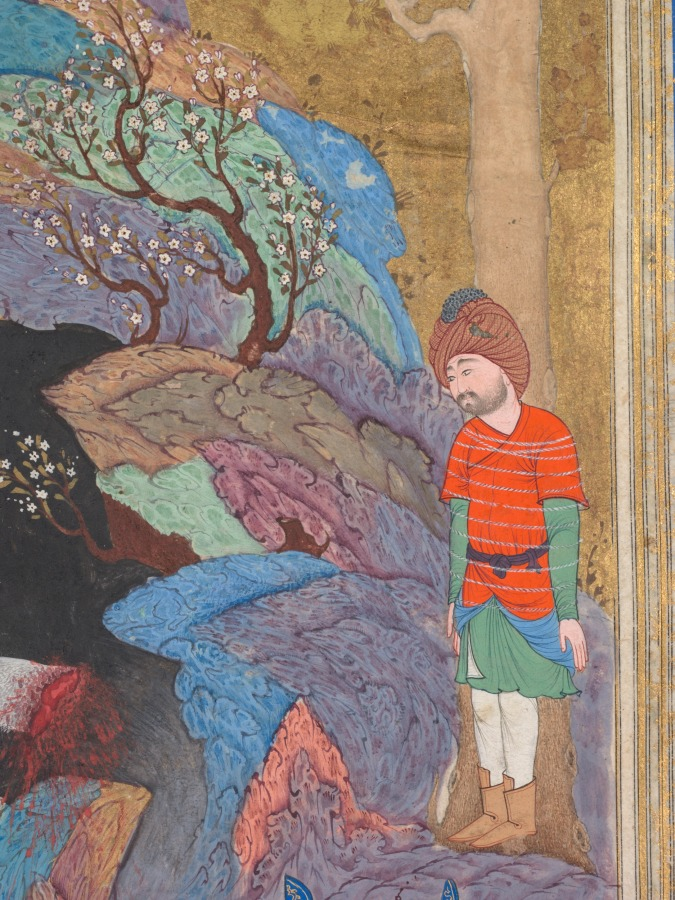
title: Rustam's seventh course: He kills the White Div, folio 124 from a Shah-nama (Book of Kings) of Firdausi (Persian, about 934–1020)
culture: Iran, Tabriz, Safavid period (1501-1722)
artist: attributed to Abd al-Vahhab (Persian, active about 1516)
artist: attributed to Mir Musavvir (Iranian, c. 1510–1555)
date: 1522–37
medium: Gum tempera, ink, gold, and silver on paper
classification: Manuscript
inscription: Script: Nasta'liq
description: The legendary hero Rustam brutally takes the demon chief’s liver blood, needed to cure his king of blindness. Paintings from the Shah-nama made for the Persian ruler Shah Tahmasp (reigned 1524–76) were acclaimed in their day for their brilliant coloring and refinement. Seven of the artists who contributed to this book moved to India to lead the new Mughal painting workshop in the 1550s. They introduced to the Indian artists a more complex color sensibility and preference for presenting faces in three-quarter view, as opposed to in profile.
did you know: Devils in the details: three peer into the White Div’s lair by the Caspian Sea.